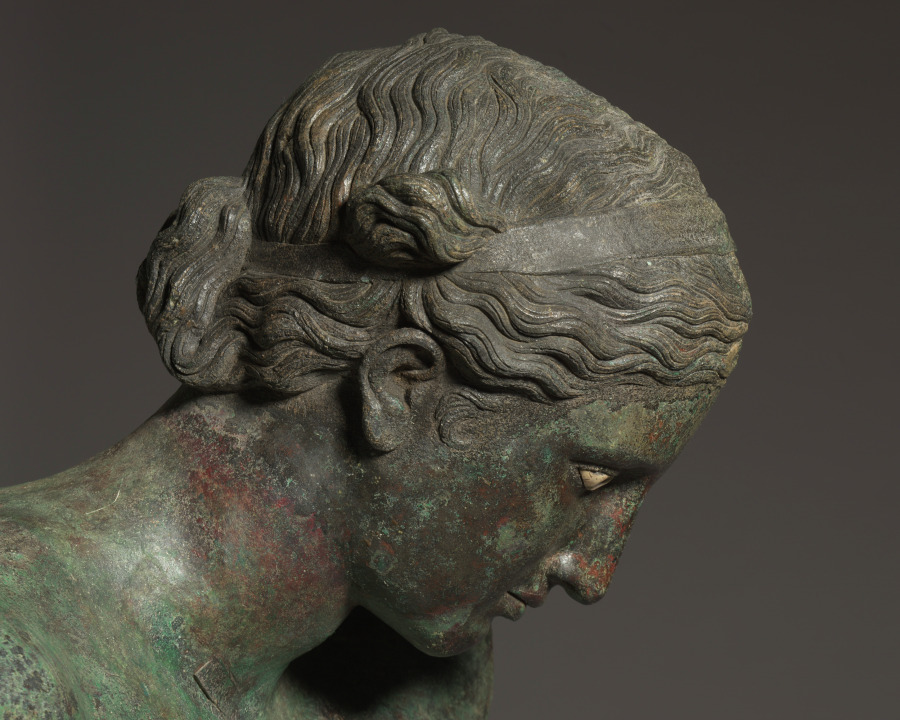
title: The Cleveland Apollo: Apollo Sauroktonos (Lizard-Slayer) or Apollo the Python-Slayer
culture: Greece, Athens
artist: attributed to Praxiteles (Greek, Athenian, c. 400–330 BCE)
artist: or Follower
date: c. 350–200 BCE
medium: bronze, copper and stone inlay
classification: Sculpture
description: The Cleveland Apollo was cast in multiple sections using the indirect lost-wax technique. First, molds were taken from a working model (now no longer known or preserved), which was then reproduced in hollow wax sections, each filled with a clay core. After details were added to the wax models, each was encased in clay. Then, the wax was heated, melted out, and replaced by molten bronze. Once cooled, the hollow bronze sections were fused together and finished, patching flaws and adding inlays and other details. Since the initial model was retained, it could be reused, allowing ancient sculptors to create multiples and variations of favorite works. Thus, remarkably, the Cleveland Apollo may once have been one of several such works. The consistently thin walls of the Cleveland Apollo (mostly 5-6 mm thick), together with the nearly invisible joins between most cast sections, show that it was created by highly skilled sculptors and foundry workers. Close looking reveals several noteworthy features. First, ovals atop the right foot mark a fusion weld, where molten bronze pooled to join separately cast sections. Second, small rectangular bronze patches cover parts of the surface (especially the right hip), each carefully cut and then hammered into place over holes or other casting defects. Inlaid lips, nipples, and eyes (the right ancient stone, the left now a modern replacement) added to the lifelike appearance of the sculpture, contrasting with the once bronze-colored skin. Finally, radiography helps to illuminate hidden features, such as the cast edge of the neck of Apollo.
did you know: Ovals across the top of the right foot show a clear join between separately cast sections.